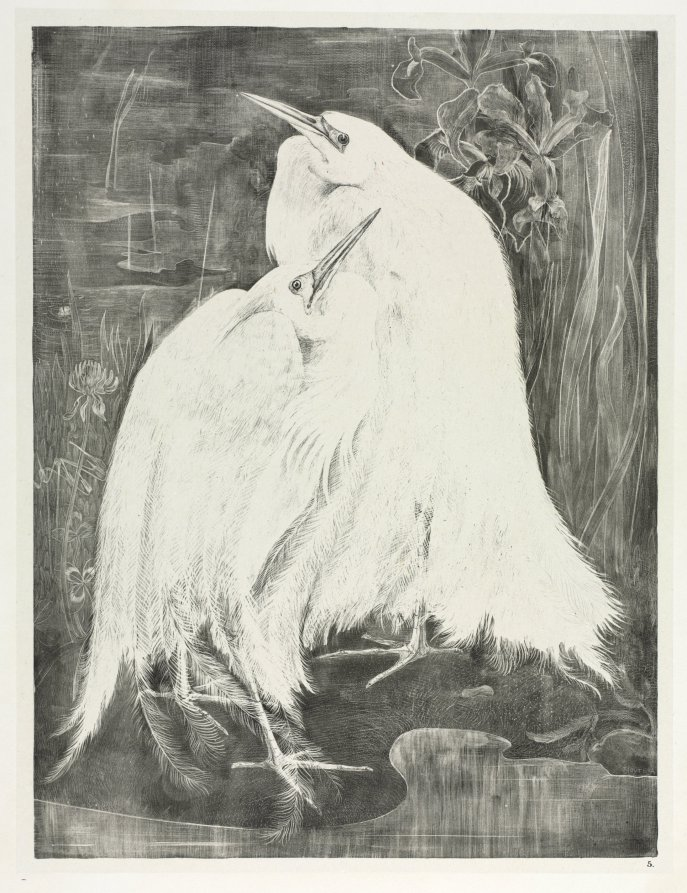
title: Animal Studies: Two Silver Herons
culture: Netherlands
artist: Theo van Hoytema (Dutch, 1863–1917)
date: 1898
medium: embossed lithograph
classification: Print